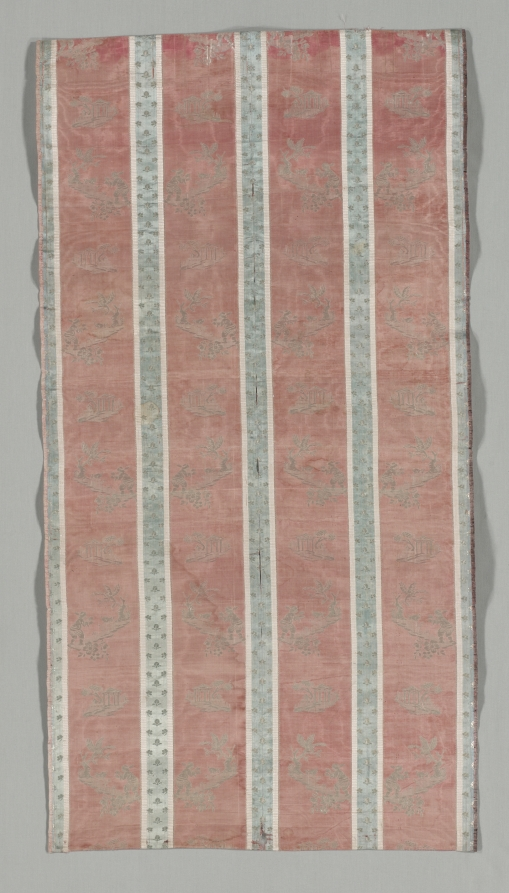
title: Length of Textile with Classical Ruin in a Landscape Design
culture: France, early 19th century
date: early 1800s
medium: silk lampas patterned weave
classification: Textile